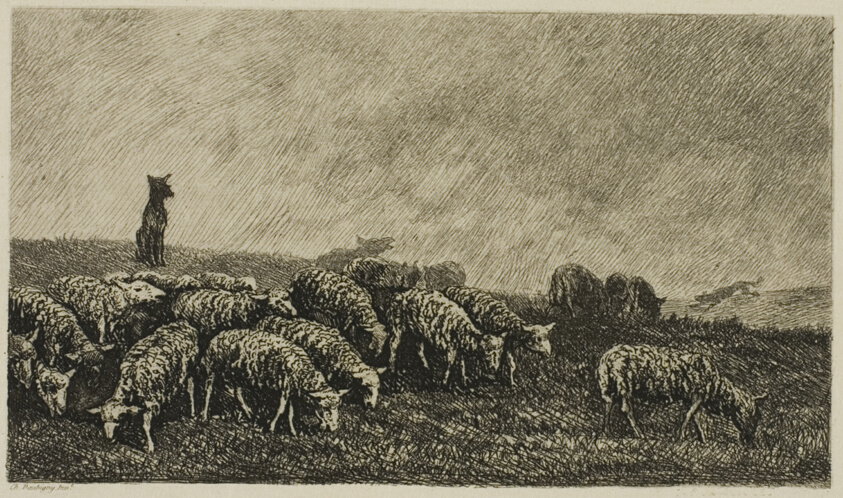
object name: Print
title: The Dog's Watch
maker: Charles François Daubigny (French, 1817-1878)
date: 1857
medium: Etching on cream Japanese paper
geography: France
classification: etching; print; prints and drawing